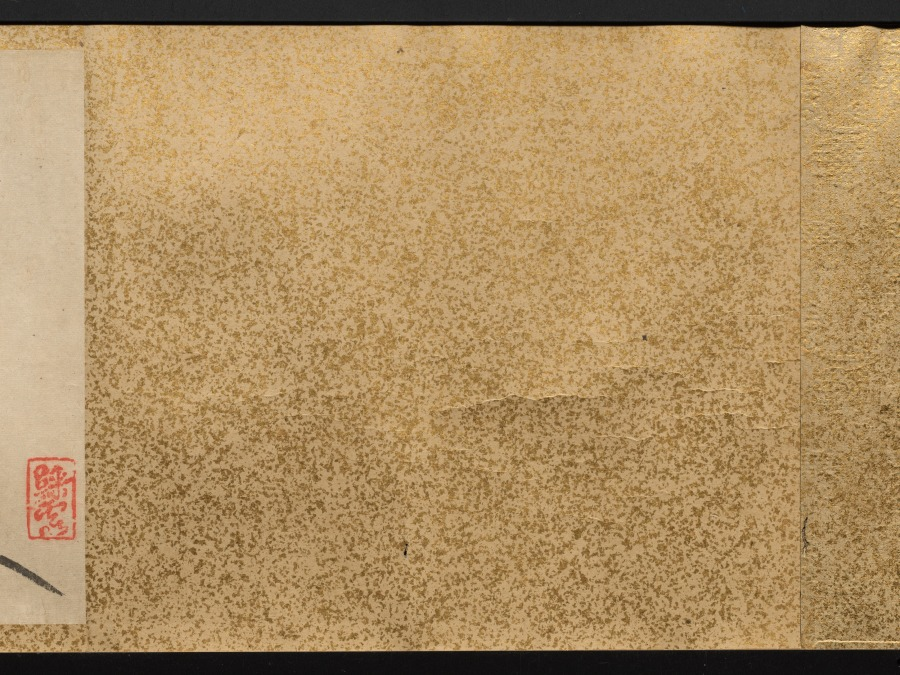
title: Plum Blossoms and Peonies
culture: China, Qing dynasty (1644-1911)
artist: Gao Fenghan (Chinese, 1683–1749)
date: 1741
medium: handscroll, ink on paper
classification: Painting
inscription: Artist's 2 inscriptions and 9 seals (the painting of Peonies with the artist's colophon and the colophon by Hou Chia-fan are on a single sheet of paper). Artist's inscription and 2 seals (Plum Blossoms): [seal] Ts'ai-yün. After finishing writing my colophon, I unrolled the painting to take another look, and it now seems that the composition here should have moved to the later part of the scroll. If that is the case, then the "Cool Beauty" [prunus] of the Solitary Hill is after all unable to take precedence over the "King of Flowers" [peony]. A laugh. Lao-fou inscribed. [seal] Feng-han. Artist's colophon (Plum Blossoms): [3 seals] Tun; Yen-yün-kung-yang, Hou-shang-tso-sheng. A few days after I painted this scroll for Shui- hsien [Yüeh Meng-yüan], the plum blossoms were in full bloom at his residence. He invited me over to enjoy them together for a long while, and I composed two additional poems and wrote them down here for his criticism. [Poems on the colophon are not translated.] First month, twenty-first day, your junior, Kao Feng-han of Nan-fou drafted this with the left hand. [seal] Feng-han. Artist's inscription and 4 seals (Peonies): Brushed with the left hand in the hsin-yu year [1741]. [seal] Yu-hsi. [3 seals at end of painting] Hou-shang-tso-sheng; Yen-yün-kung-yang; Shih-tsao-wu. Artist's colophon and seal (Peonies): The imperial concubine from the Yang family loved to dress in red, And from the emperor won the title of Hai-t'ang. But ever since she became the new dream of the moon palace, She changed into rainbow colors, while learning to dance. After I wrote the poem on Looking for Plum Blossoms in the Teng-wei Mountains, I attached to it a few branches of prunus, some bamboo tips and a piece of rock, with a scattering of green [moss] here and there to fill up the scroll. Unexpectedly, my playful fascination [with these subjects] was still not quite satisfied, so I made up these amorous ideas and romantic images [of the peony], to follow the footsteps of the fair lady of the Ku-hsieh Mountain [prunus]. Furthermore, I picked out one poem to be my vanguard. Perhaps such luminosity of wealth and power will be enough to overwhelm the poor fellows, and [they] will not mind the comparatively short length [of paper] assigned to it. Amusingly inscribed. Please correct me again. To Shui-hsien, my learned senior, your junior Han inscribed again. [seal] Tso-hua [left-handed painting]. 1 additional colophon and 5 additional seals: 1 colophon, dated 1742, and 3 seals of Hou Chia-fan (act. ca. 1742); 1 seal of P'u Ch'üan (20th c.?); 1 seal of Li family (dates unknown).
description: One of the so-called Yangzhou Eccentrics (a group of painters who lived in Yangzhou and were known for their unorthodox art and lifestyle), Gao Fenghan depicts China’s two most loved flowers in full bloom—the “cold beauty,” or plum blossom, in the first section, and the “king of flowers,” or peony, in the second section. Painted in 1741, the year when Gao decided to leave the south and return home to Shandong province in eastern China, this work was likely a token of farewell. His casual brushwork may indicate his mental and physical struggle at the time. After having crippled his right hand in 1737, Gao used his left hand to paint and achieved a crudeness and eccentric style unattainable before.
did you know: In East Asian art, peonies traditionally symbolize prosperity and wealth.